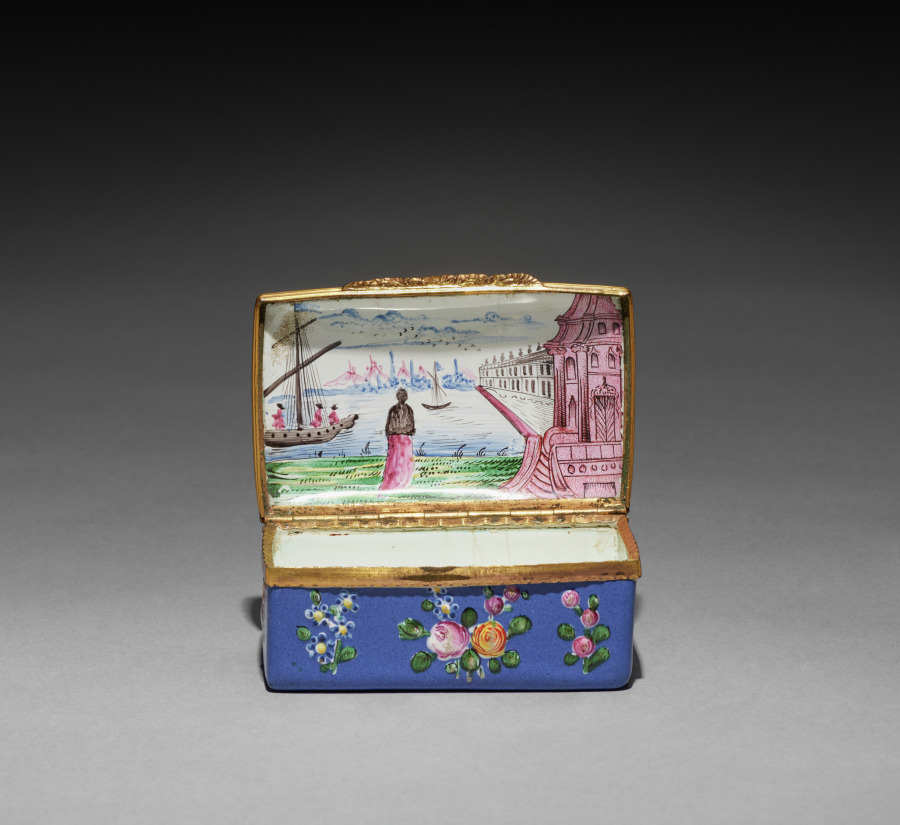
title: Snuff Box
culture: Germany ?, 19th century (?)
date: 1800s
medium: enamel on copper with metal mounts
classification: Miscellaneous